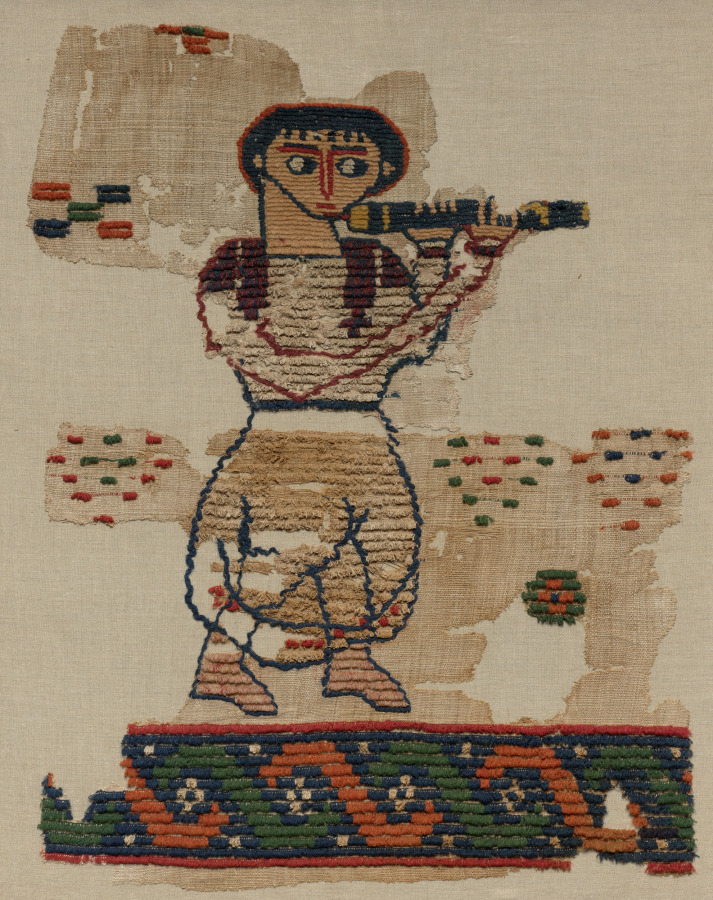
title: The Piping Maenad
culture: Egypt, Byzantine period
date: 500s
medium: tabby ground with looped-knot pile, linen and wool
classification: Textile